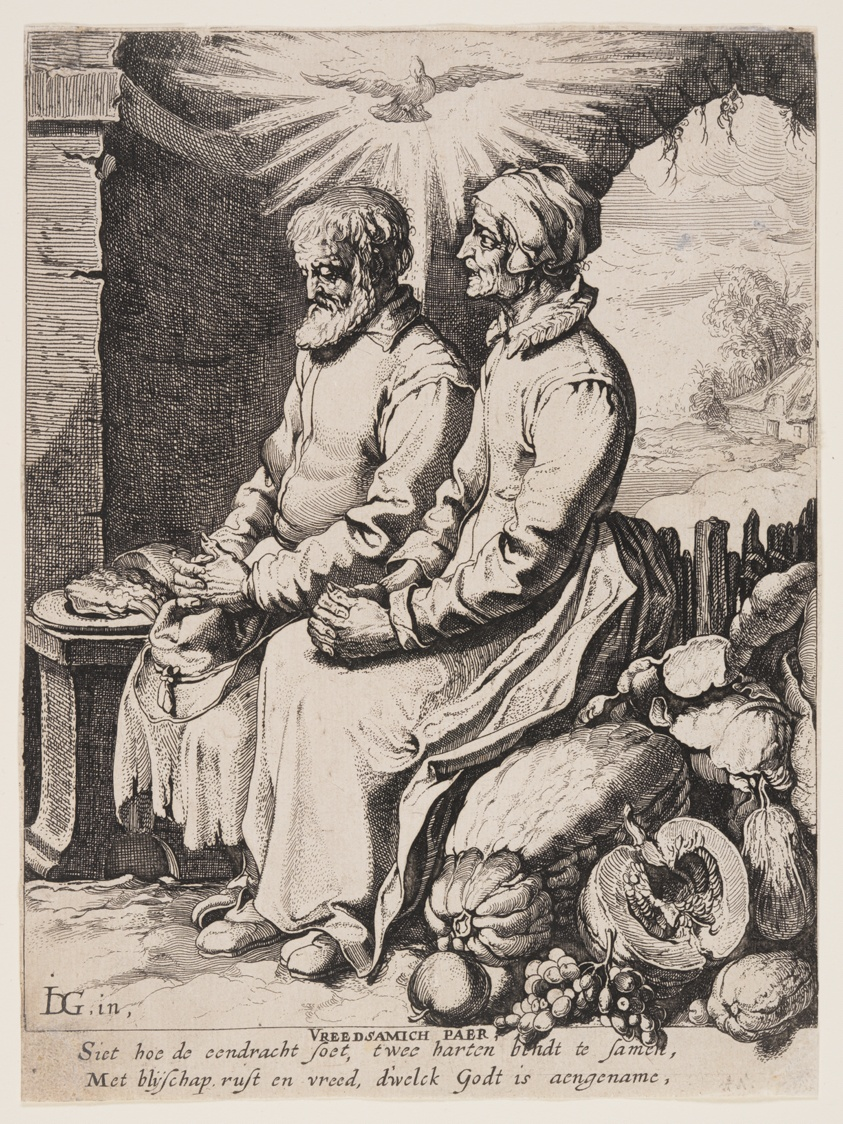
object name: Print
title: The Pious Old Couple (Vreedsamich Paer)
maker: Jacques de Gheyn III; Dutch, c. 1596–1641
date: c. 1618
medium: Etching on laid paper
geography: Netherlands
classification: etching; paper; print; prints and drawing